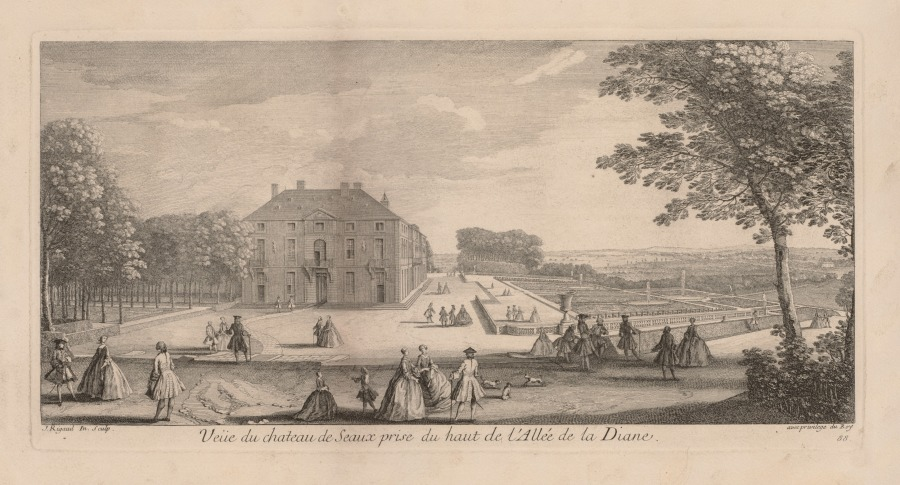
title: View of the Chateau de Seaux from Diana's Promenade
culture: France, 18th century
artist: Jacques Rigaud (French, 1681–1754)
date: c. 1720–50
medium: engraving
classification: Print